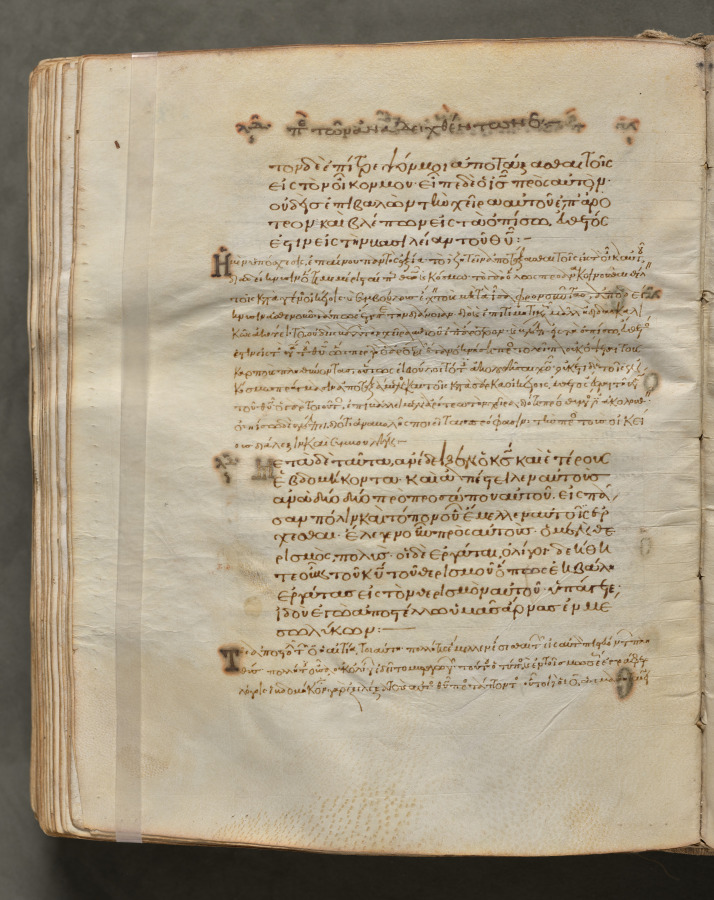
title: Text, folio 252 (verso), from a Gospel Book with Commentaries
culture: Byzantium, Constantinople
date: c. 1000–1100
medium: ink, tempera, and gold on vellum; leather binding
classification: Bound Volume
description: Each of the four gospels in this book opens on a page with brilliantly illuminated borders depicting the author of the text as well as birds—principally peacocks, symbols of the immortality of the soul—and fountains, representing the fountain of life and the salvation of the soul. This volume consists of 428 leaves with texts in Greek. Its level of sophistication suggests that it was probably written and decorated in a monastery in Constantinople.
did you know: Gospel books were carried in procession through Byzantine churches.